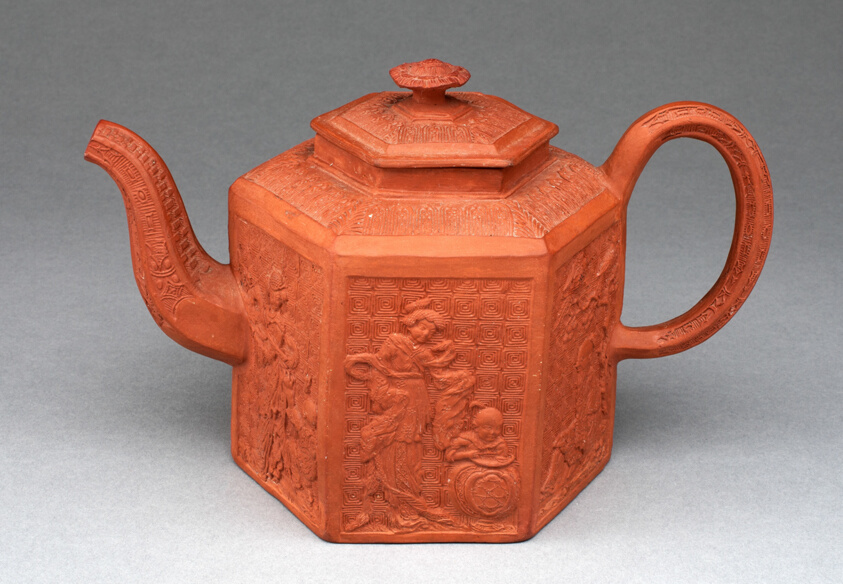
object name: Ceramics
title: Hexagonal Teapot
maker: Staffordshire, England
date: c. 1770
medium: Stoneware (redware)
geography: Staffordshire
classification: teapot; stoneware; ceramics; redware; european decorative arts